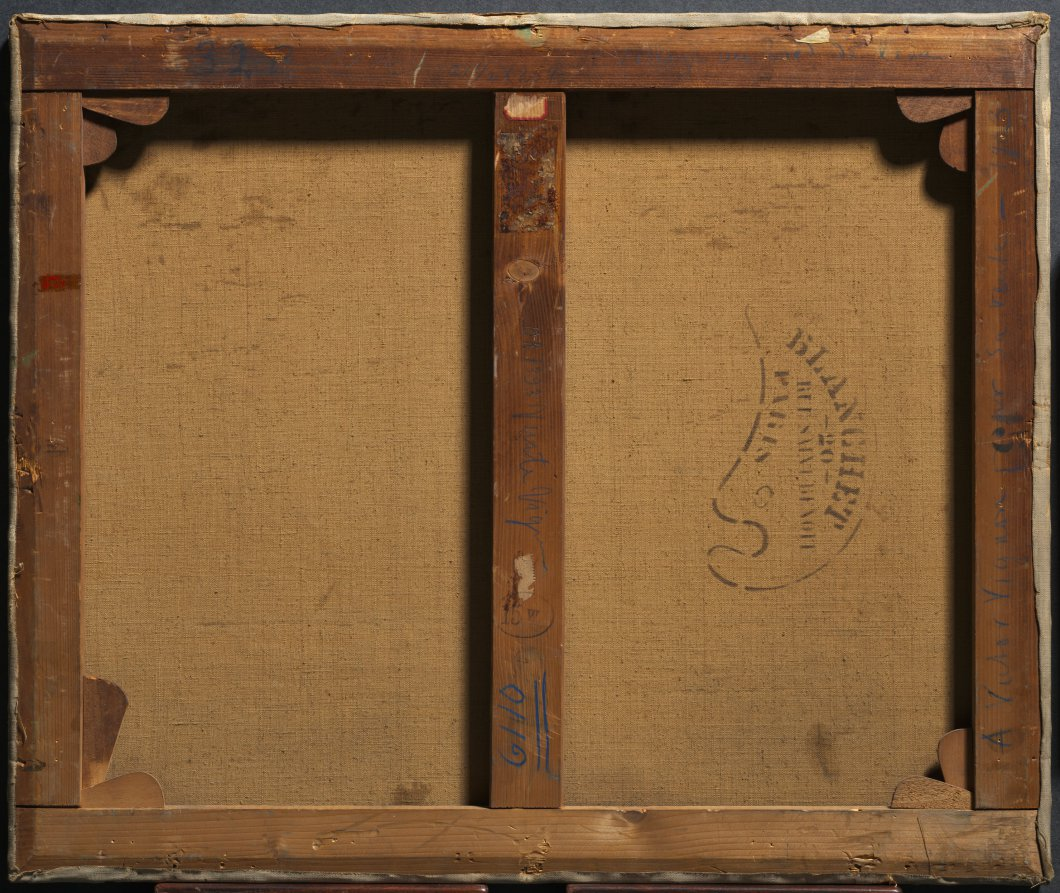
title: The River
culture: France, 19th century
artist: Maxime Maufra (French, 1861–1918)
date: 1902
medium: oil on fabric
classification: Painting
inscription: Signed lower right: Maufra 02